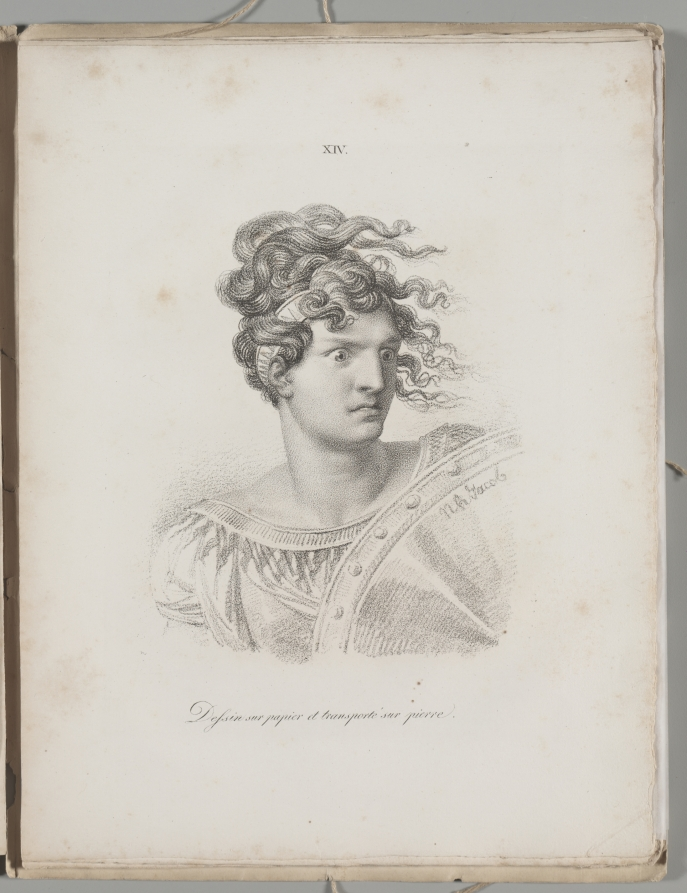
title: Art of the Lithograph: Head of an Amazon, Plate XIV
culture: Germany, 19th century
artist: Alois Senefelder (German, 1771–1834)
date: 1819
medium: lithograph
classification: Portfolio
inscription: On plate: lower center: Dessin sur papier et transporté sur Pierre; above: XIV